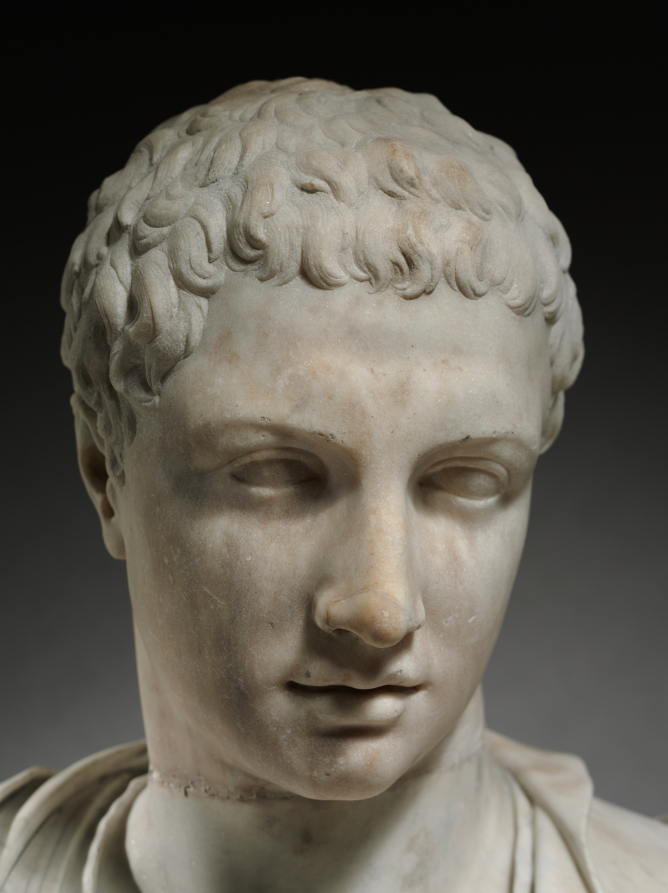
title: Bust of a Roman General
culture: Italy, 16th century or later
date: 1500s or later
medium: marble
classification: Sculpture